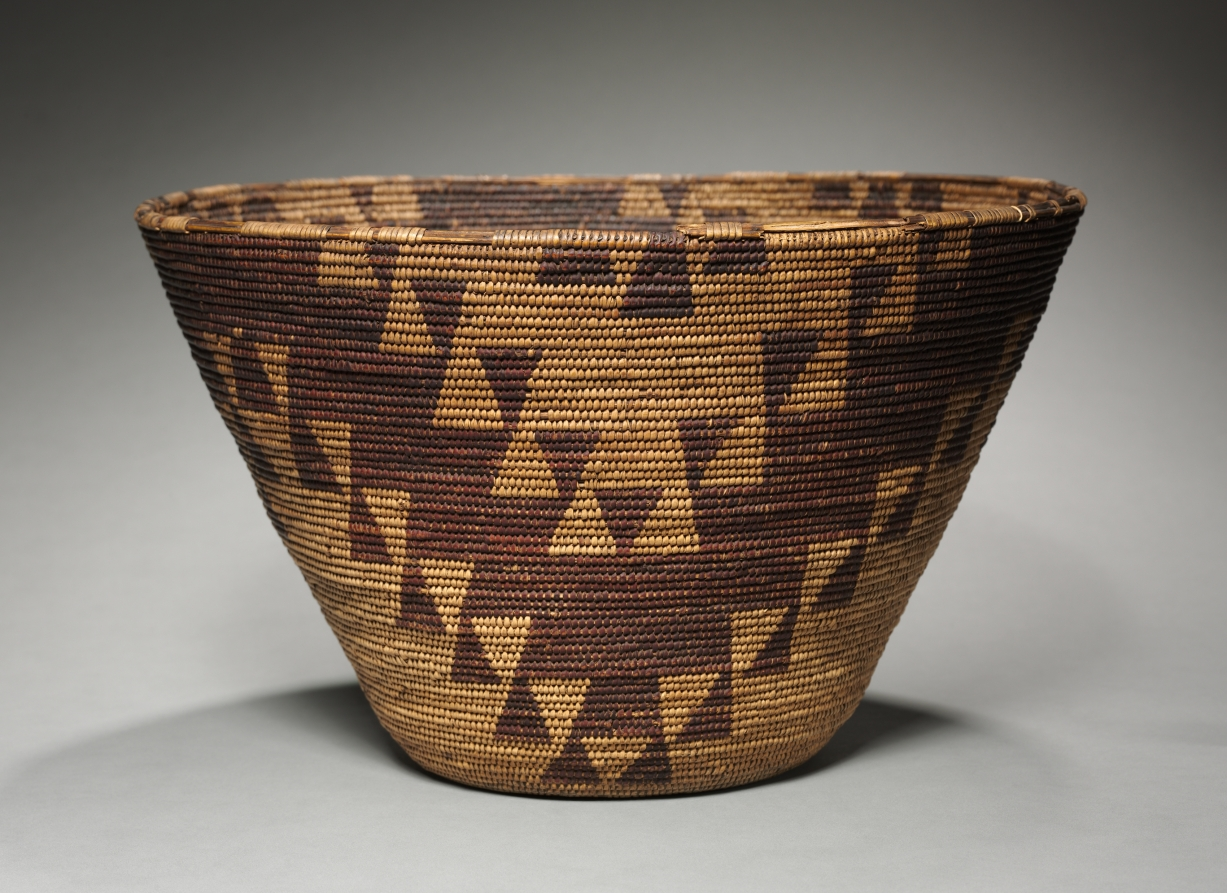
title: Cooking Bowl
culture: California, Maidu, Southern (Nisenan), Unassigned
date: Unassigned, before 1917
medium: redbud, coiled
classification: Basketry